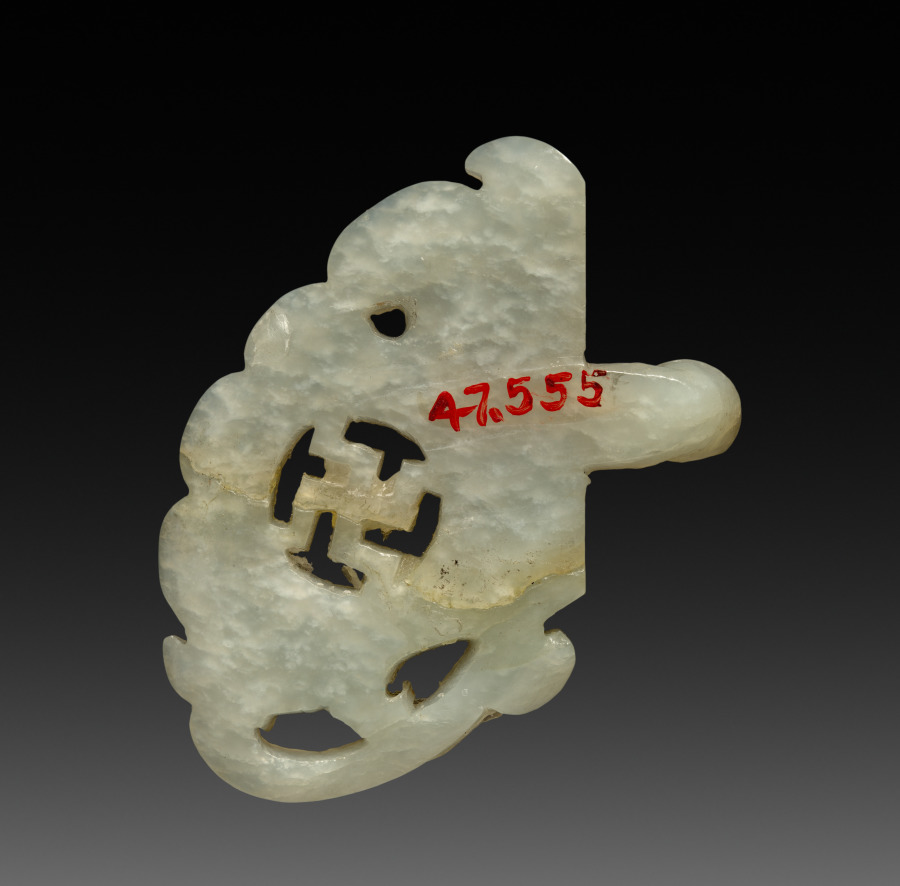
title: Part of Buckle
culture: China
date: 1800s–1900s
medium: white jade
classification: Jewelry